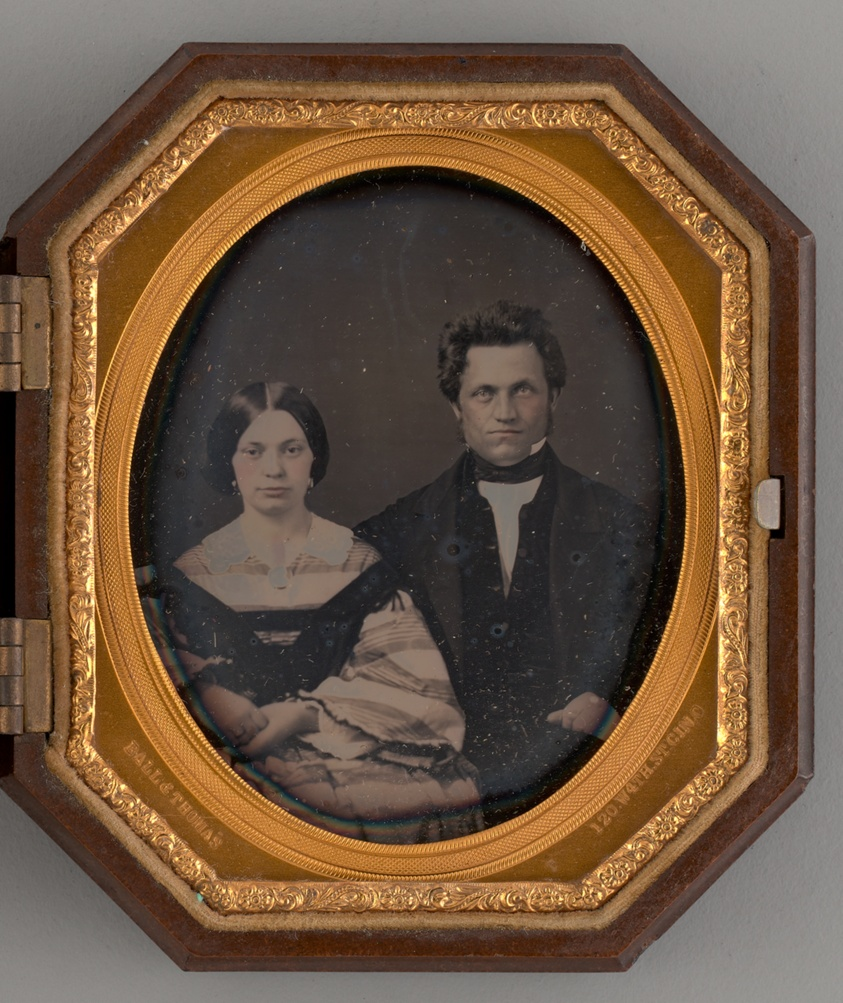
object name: Photograph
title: Untitled (Portrait of Man and Woman)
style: 19th century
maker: James Presley Ball & Thomas; American, active 1840s-1870s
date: 1855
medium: Daguerreotype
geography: United States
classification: portrait; photograph; photographic process; photography; portrait; daguerreotype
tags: lundberg collection, portrait, couples, portraits: multiple subjects, portraits